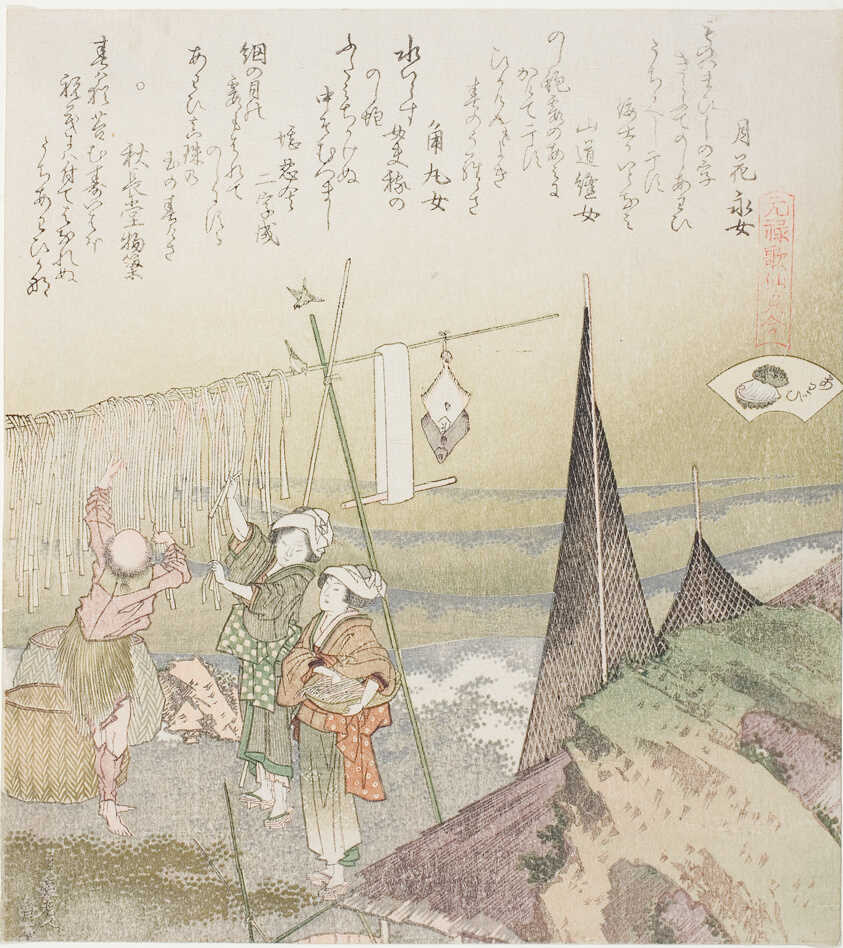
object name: Print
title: Hanging Abalone Out to Dry, illustration for Abalone (Awabi), from the series "A Matching Game with Genroku-period Poem Shells (Genroku kasen kai awase)"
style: Japanese (culture or style)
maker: Katsushika Hokusai 葛飾 北斎; Japanese, 1760–1849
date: 1821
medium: Color woodblock print with metallic pigments; surimono shikishiban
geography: Japan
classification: woodblock print; print; asian art